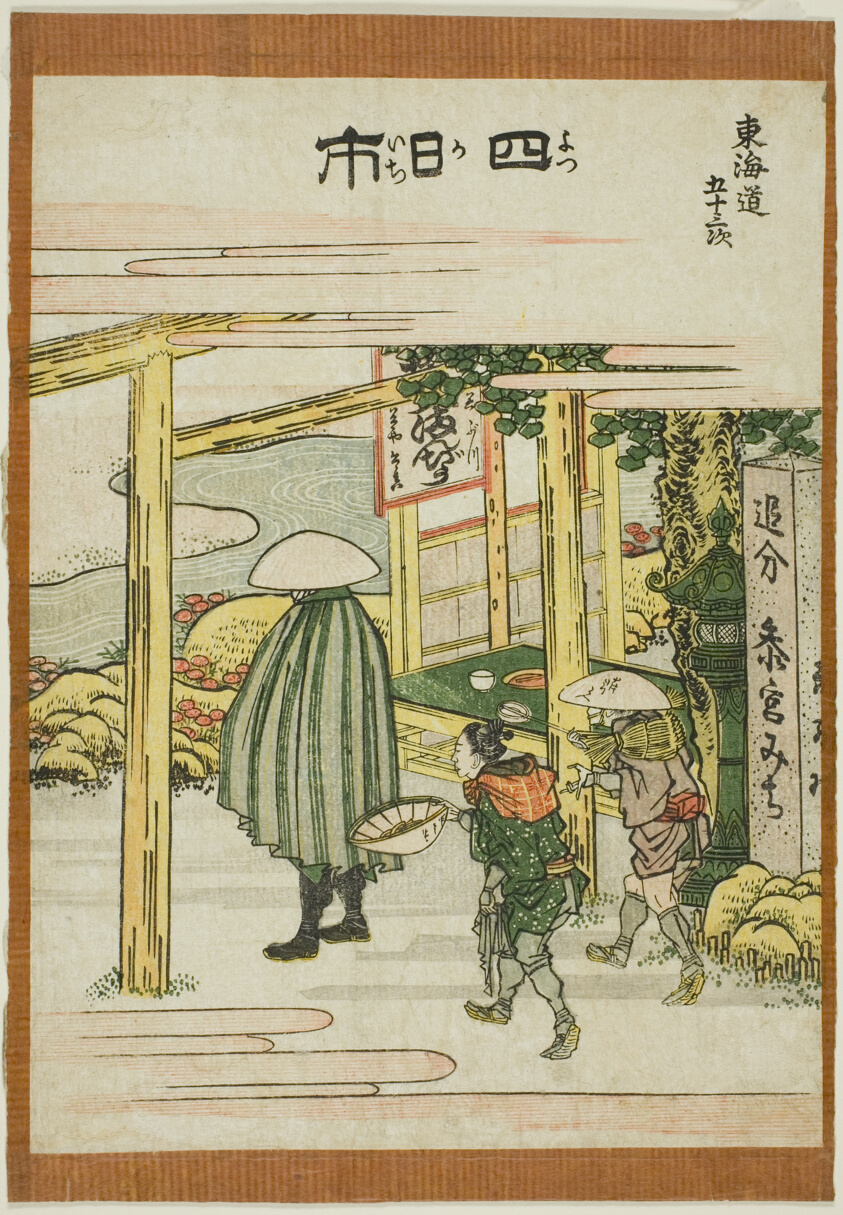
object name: Print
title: Yokkaichi, from the series "Fifty-three Stations of the Tokaido (Tokaido gojusan tsugi)"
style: Japanese (culture or style)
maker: Katsushika Hokusai 葛飾 北斎; Japanese, 1760-1849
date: c. 1806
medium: Color woodblock print; chuban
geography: Japan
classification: woodblock print; print; asian art